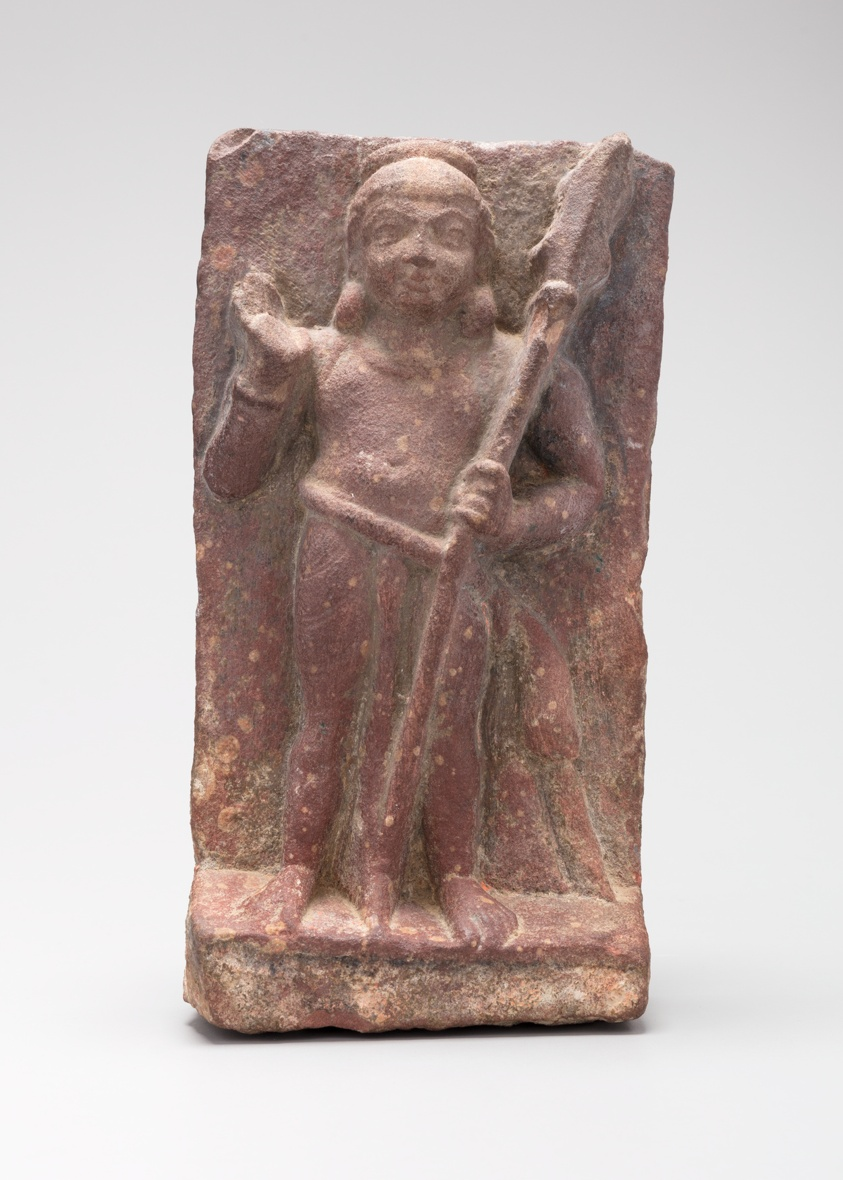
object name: Sculpture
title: Karttikeya, God of War, Holding a Spear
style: South Asian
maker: India; Uttar Pradesh, Mathura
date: 2nd century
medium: Spotted red sandstone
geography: Mathura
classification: stone (unidentified); stone; sculpture; asian art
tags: gods (deities), Hindu, religion, skanda karttikeya